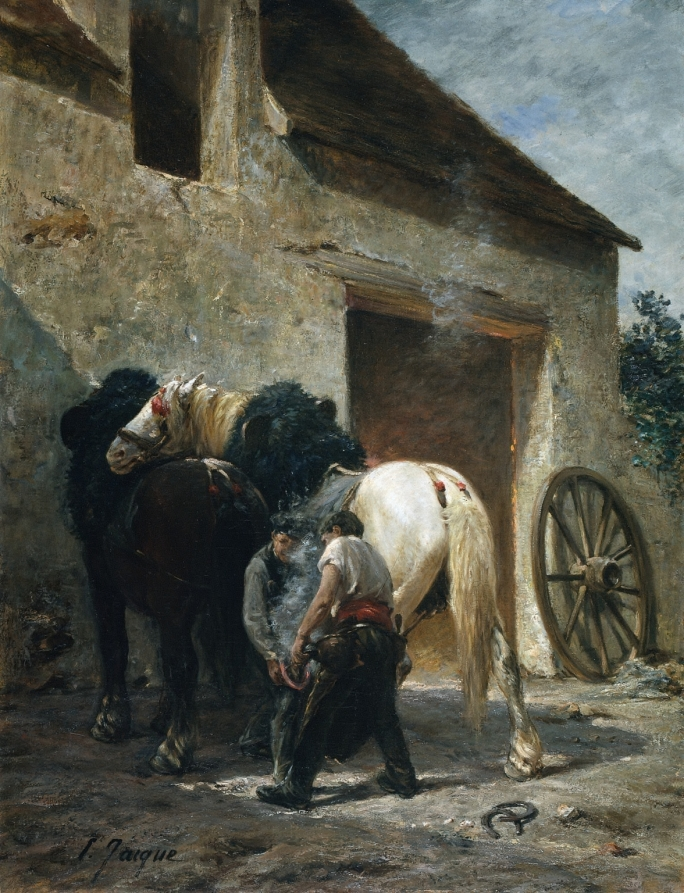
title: Blacksmiths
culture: France, 19th century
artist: Émile Jacque (French, 1848–1912)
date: after 1887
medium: oil on fabric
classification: Painting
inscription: Signed lower left: E. Jacque